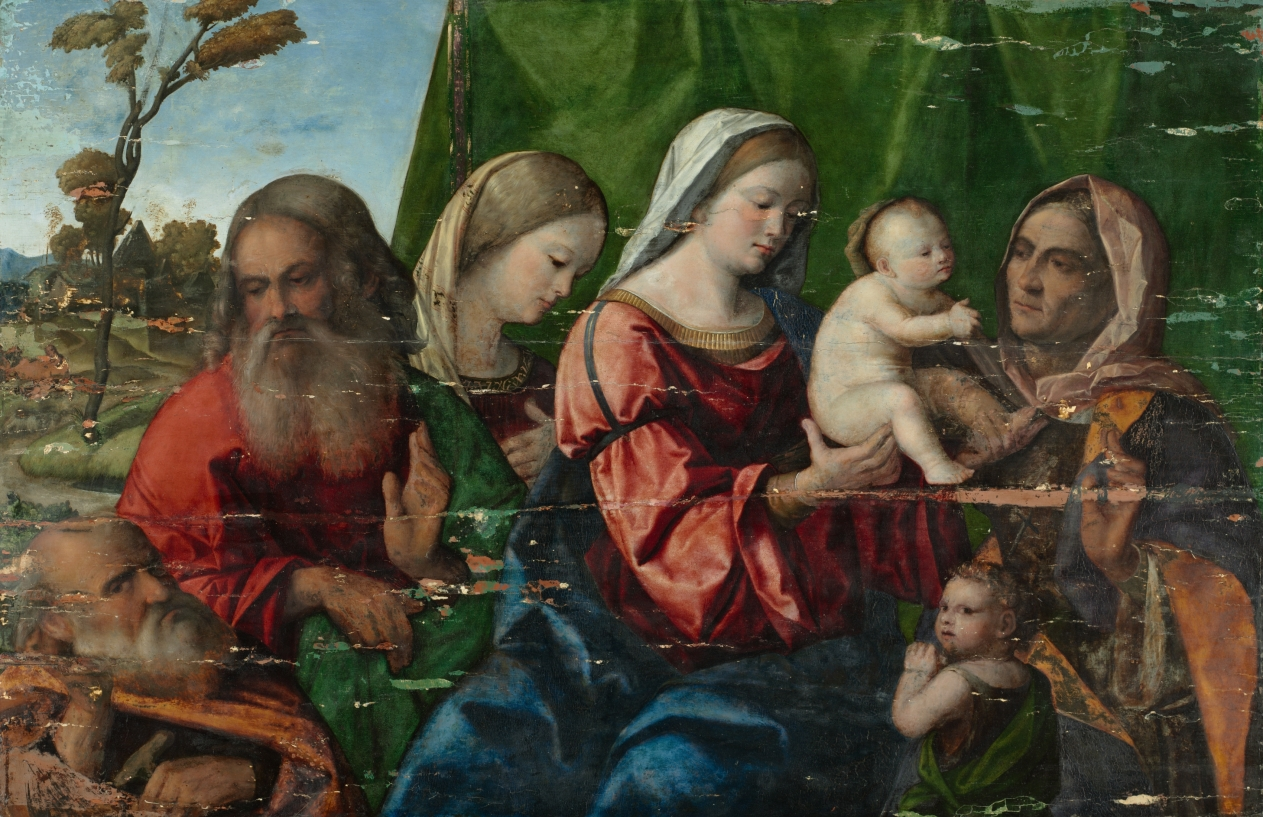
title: Virgin and Child with Saints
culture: Italy, Venice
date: c. 1510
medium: oil on wood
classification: Painting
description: What are some of the key steps in conserving this picture? While it may seem disturbing, the condition of this work is not unusual for a 16th-century panel painting. Treatment was abandoned decades ago when the conservator who was cleaning the work left the museum. Brilliant colors and beautiful original passages remain, including expressive folds of red drapery and delicate flesh tones. New technical research could tell us more about how the panel was painted and subsequently treated. Identifying the artist is another key step that would help conservators reconstruct distinctive passages like hands and facial features. A painting by Francesco Bissolo in Munich (below) is closely related in subject and style and may provide some clues.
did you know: The Virgin Mary is often depicted wearing blue and red, symbolizing her purity and devotion.